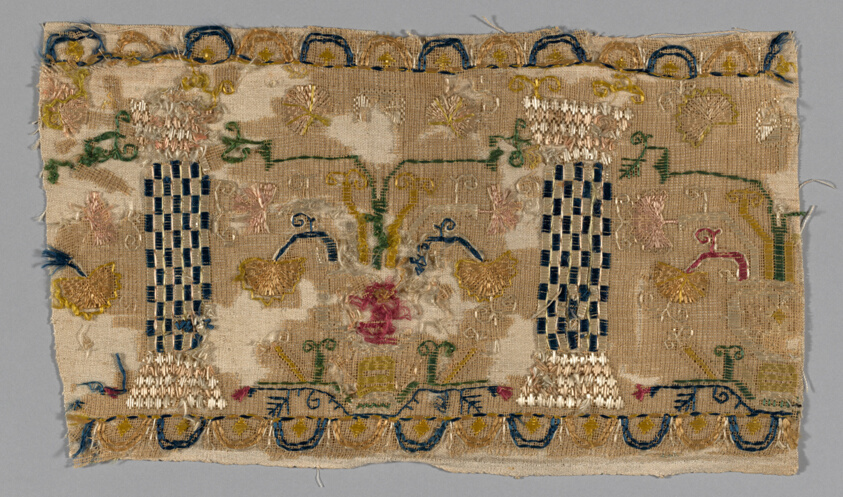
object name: Textile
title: Fragment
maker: Italy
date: 17th century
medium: Embroidered with silk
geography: Italy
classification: textile; needlework (visual works)